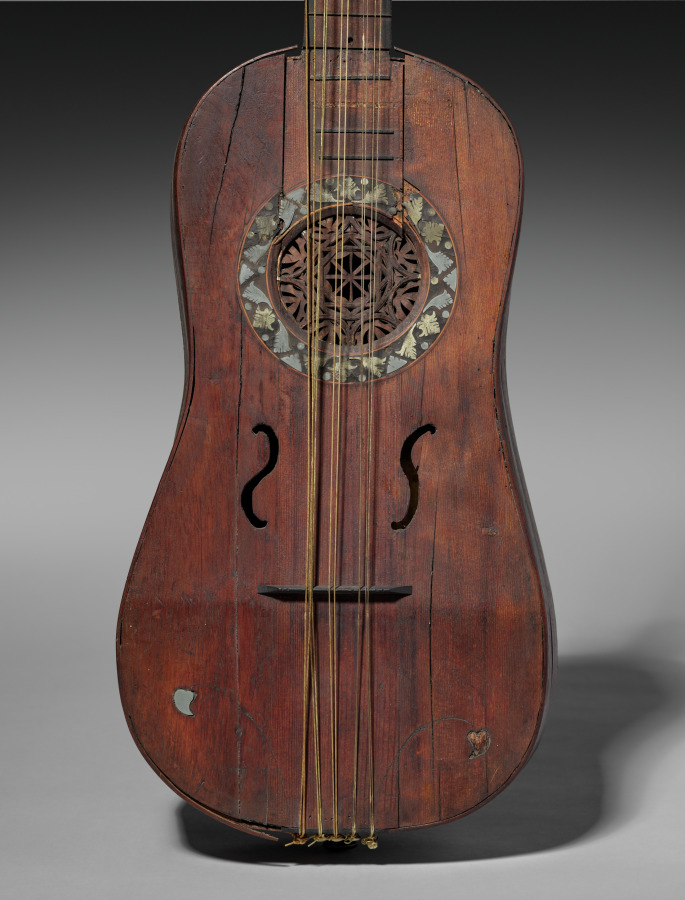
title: Chittara Battente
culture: Italy, 15th century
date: 1400s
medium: wood, paper?, sound hole, bone bridge, sheet metal inlay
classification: Musical Instrument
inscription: bears broken ticket of parchment.